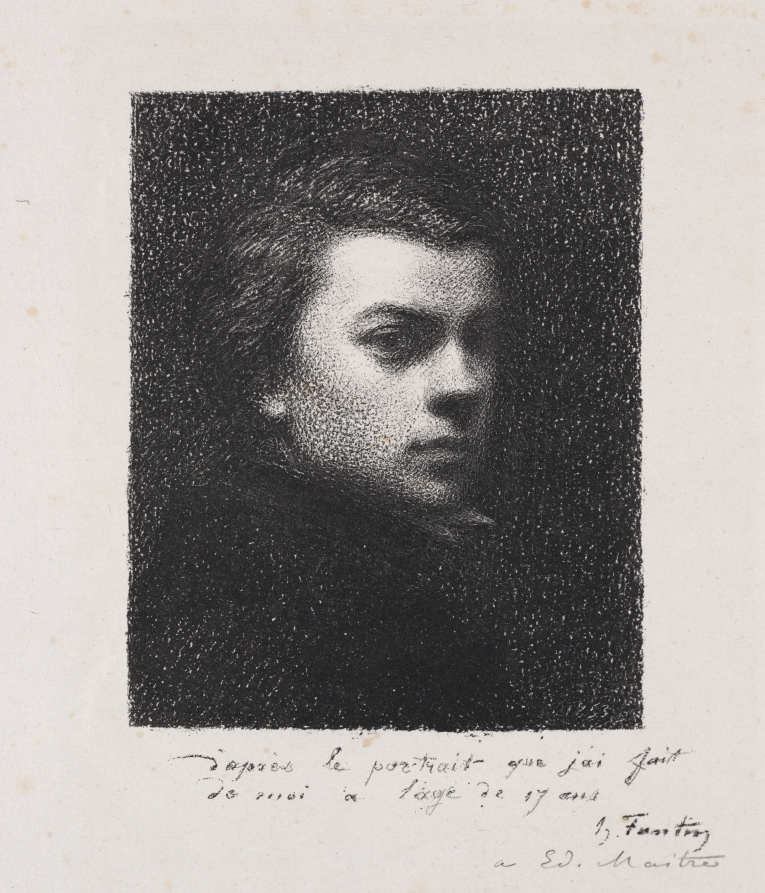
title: The Artist at 17 Years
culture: France, 19th century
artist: Henri Fantin-Latour (French, 1836–1904)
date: 1892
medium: lithograph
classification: Print